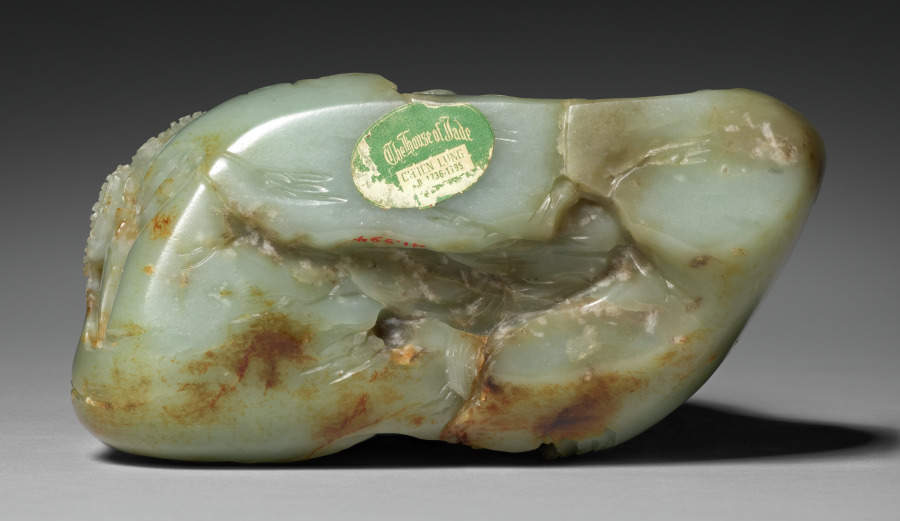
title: Miniature Mountain with Daoist Paradise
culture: China, Qing dynasty (1644–1911), Qianlong reign (1736–95)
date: 1736–95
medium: green jade with brown markings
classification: Jade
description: Sizable jade boulders of mountainous landscapes were carved to represent the search for the paradise or immortals' dwellings in the mountains. This Daoist theme has fired the Chinese imagination throughout history. Believed to have spiritual and magical properties, jade has long been used in tombs and intended for preserving the corporeal body and the soul in the quest for eternity. It is recorded that Daoist practitioners drank morning dews with scraps of jade as an elixir of immortality.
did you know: The bearded immortal is accompanied by a servant carrying a cluster of peaches, symbols of immortality.